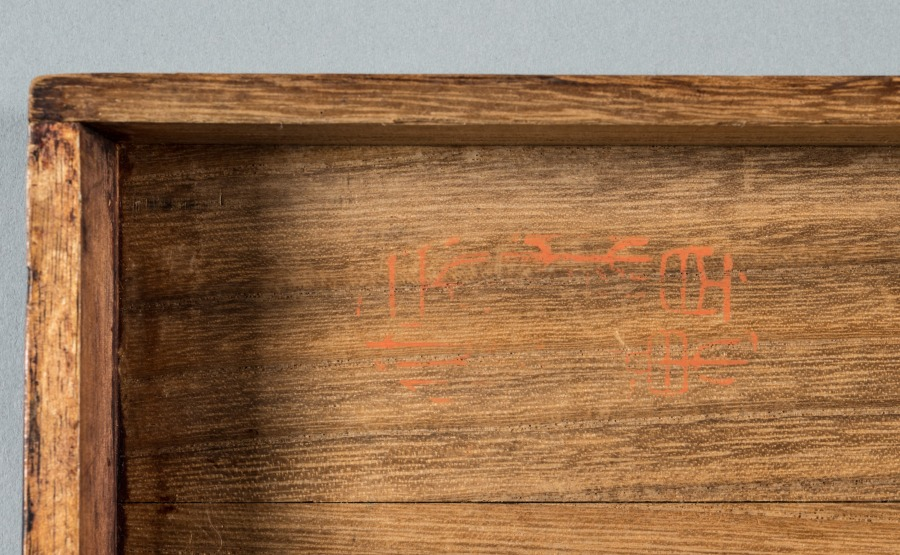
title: Fujiwara no Muchimaro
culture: Japan, Kamakura period (1185–1333)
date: 1200s or 1300s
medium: Hanging scroll; ink, color, gold, and cut gold on silk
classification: Painting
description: This portrait of Fujiwara no Muchimaro (680–737), a grandson of Fujiwara no Kamatari (614–669), includes an image of Buddha Dainichi Nyorai above his head. By situating the image of Dainichi there, this painting would seem to assert that Muchimaro is an avatar of Dainichi. In the same way that kami could be identified with Buddhist counterparts, powerful humans could also be seen as manifestations of Buddhist deities. A similar painting is at Eizanji in Nara, of which Muchimaro is known as the founder. It was once a branch temple of Kōfukuji, the Fujiwara family temple.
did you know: The boughs of wisteria appearing in the background symbolize the figure's status as a Fujiwara family member.